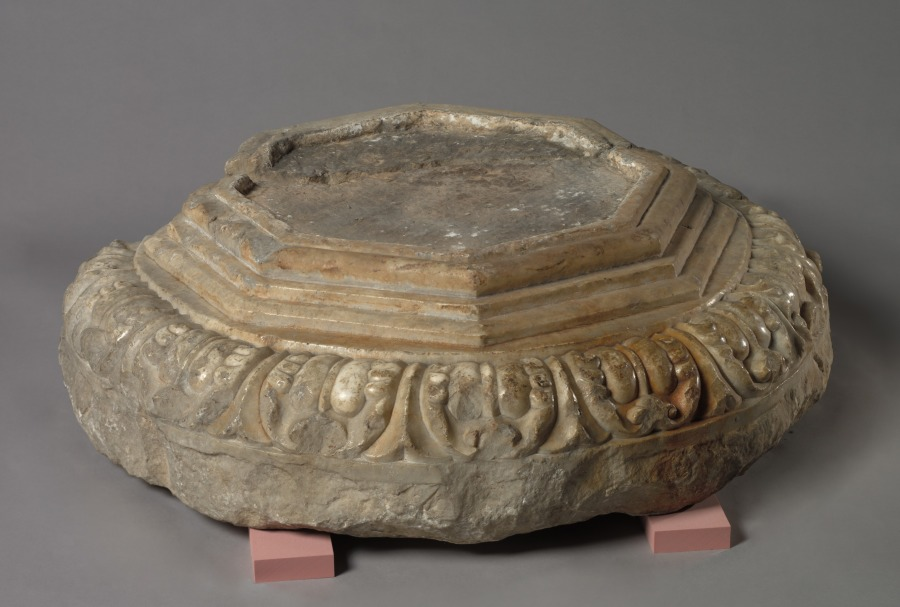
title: Fang Xuanling Pedestal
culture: China, Tang dynasty (618-907)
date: 647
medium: marble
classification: Sculpture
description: This double lotus pedestal exhibits the rich, ornate style of early Tang sculpture. It was commissioned by the Duke of Liang, Fang Xuanling (578–648), for the blessing of his second son and daughter-in-law, the Tang imperial princess of Gaoyang. The iconography and inscription suggest that it originally went with a statue, now missing, of Shakyamuni, the historical Buddha, instead of Amitayus. Today the pedestal is topped with Amitayus, the Buddha of Infinite Life, seated in meditation. Although the pedestal was not made with the statue, the combination is faithful to the original artistic conception.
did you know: In front, the top layer of the pedestal has an abstract curvilinear motif suggesting drapery; the rear is carved with a flower-and-leaf motif.